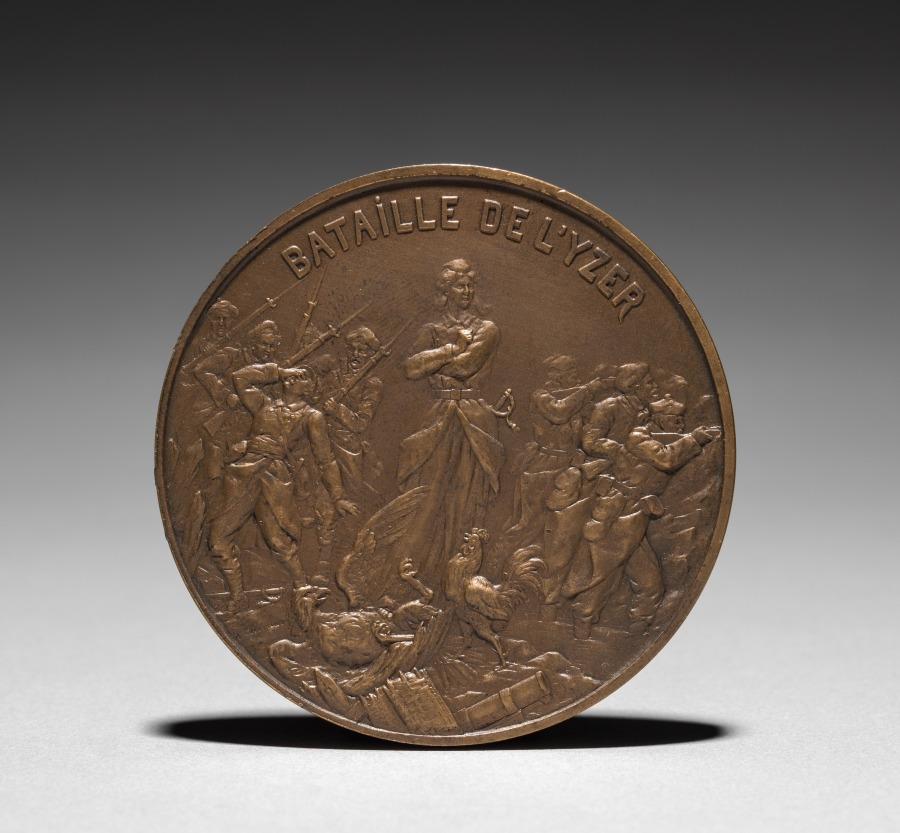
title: Medallion (obverse)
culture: France, 19th-20th century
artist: Henri Emile Allouard (French, 1844–1929)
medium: bronze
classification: Metalwork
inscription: "Bataille de l'Yzer."